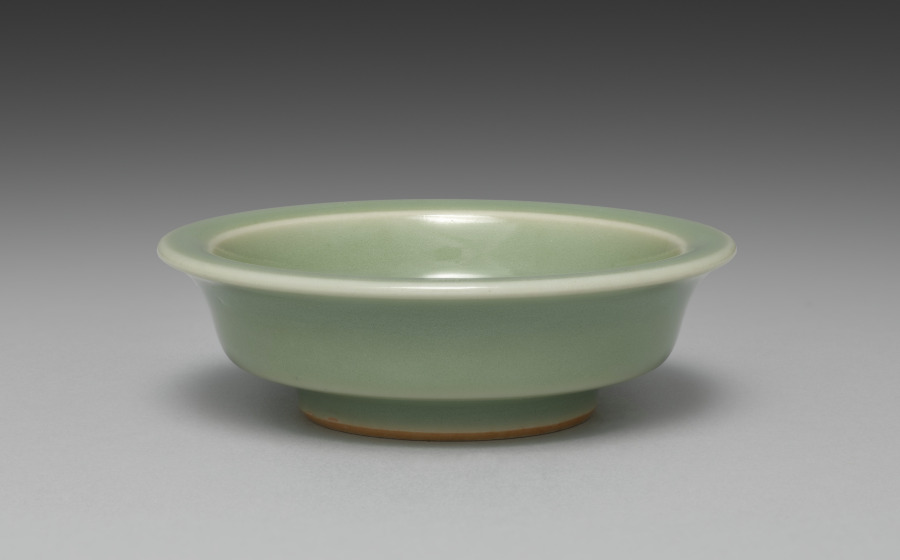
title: Saucer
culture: Japan, Meiji period (1868–1912)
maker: Seifū Yohei III (Japanese, 1851–1914)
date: 1893–1914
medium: One from a set of ten dishes; porcelain with green glaze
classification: Ceramic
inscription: 清風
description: Yohei III’s main output for his sophisticated clientele was in the form of tea sets and dining sets. He created a range of dishes in green glazes. He often produced in pairs, sets of five, or sets of ten. For this set of ten small dishes in a simple, round form that emphasizes the glaze above all, the box lid designates the piece as seiji, or green-glazed porcelain, using a general term for the extensive palette of green glazes often called celadon in English. The box lid further identifies the dishes themselves as tōchō, literally “bean-sized saucers,” a size that makes them suitable for dipping sauces.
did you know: The ten dishes in this set are stored in stacks of five in a two-compartment box.